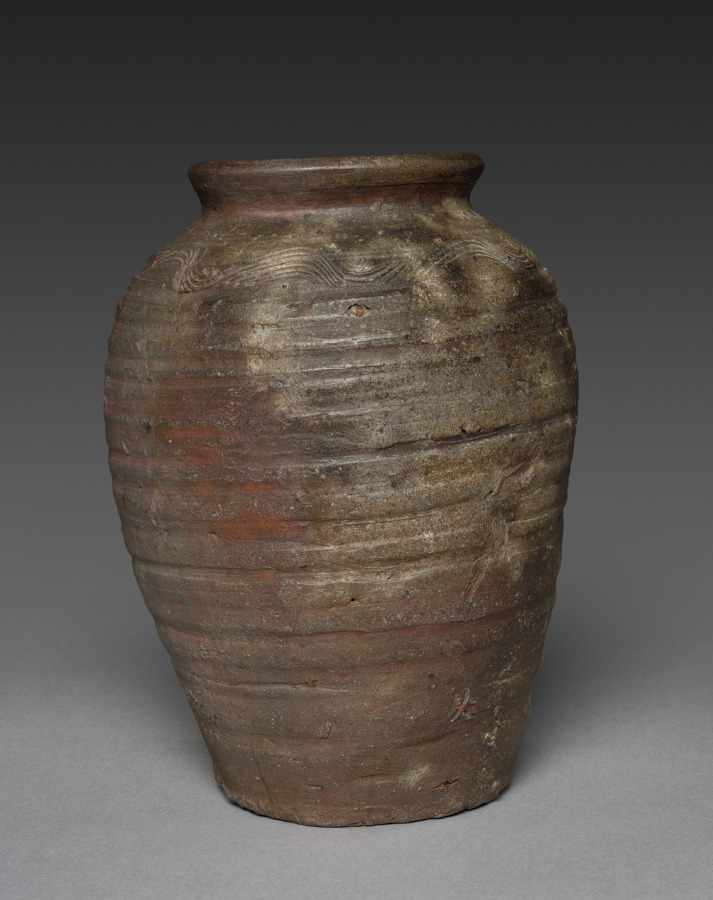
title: Storage Jar: Bizen Ware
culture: Japan, Muromachi period (1392–1573)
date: late 1400s-early 1500s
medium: stoneware with natural ash glaze, incised comb pattern, and incised potter's mark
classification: Ceramic